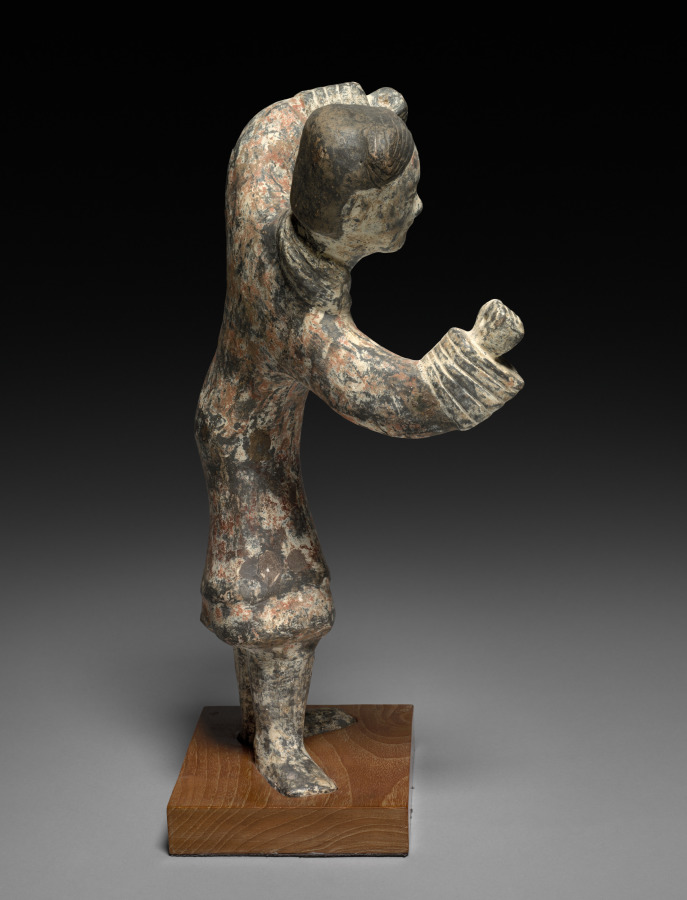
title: Dancing Figure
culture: China, style of Han dynasty (202 BCE–220 CE)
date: c. 1850–c. 1950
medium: painted plaster of Paris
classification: Sculpture